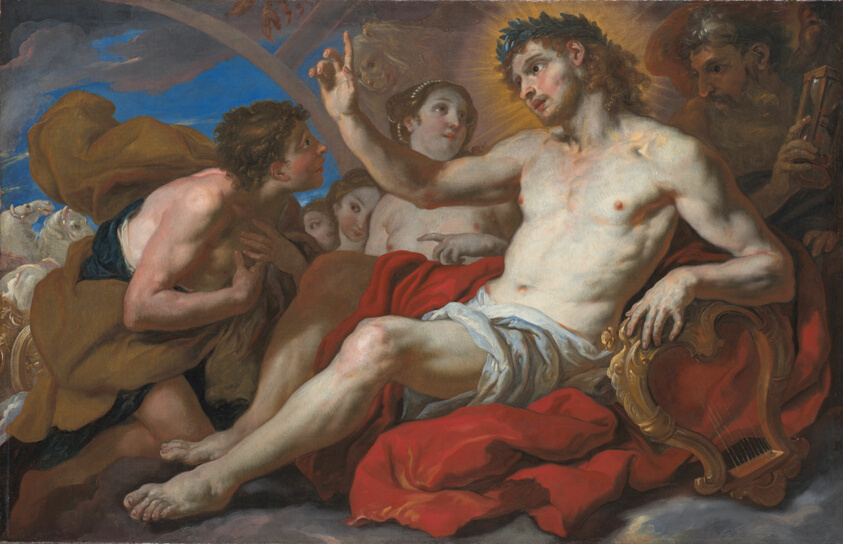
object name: Painting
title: Apollo Granting Phaeton Permission to Drive the Chariot of the Sun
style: 17th Century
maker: Johann Michael Rottmayr (Austrian, 1654–1730)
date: 1690/95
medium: Oil on canvas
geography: Austria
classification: oil on canvas; paint; oil paintings (visual works); painting; european painting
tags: mythological figures, women, textile, sun, sky, red (color), nudes, mythology, mythical, musical instruments, men, horses, harps, gods (deities), clouds, Chariots